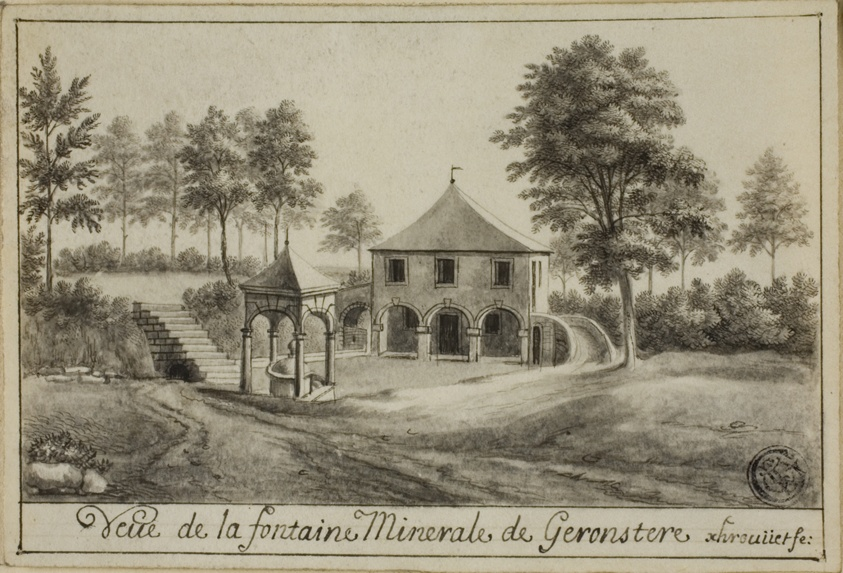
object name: Drawing and Watercolor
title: View of the Mineral Spring at Geronstere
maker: Unknown Artist; Flemish, 1600-1800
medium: Pen and black ink, with brush and gray wash, on vellum, tipped on cream wove card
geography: Flanders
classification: ink or chalk wash; drawings (visual works); prints and drawing